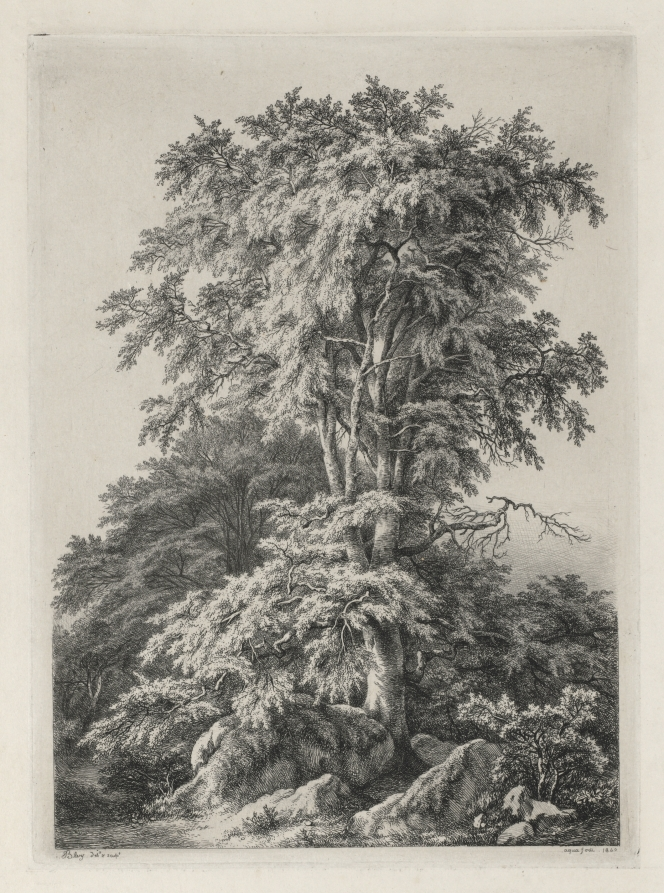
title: Studies Drawn and Engraved after Nature: The Beach, Fontainebleau (Études dessinées et Gravées D'après nature: Le hêtre, Fontainebleau)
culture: France, 19th century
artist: Eugene Bléry (French, 1805–1886)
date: 1840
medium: lithograph on chine colle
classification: Print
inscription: lower left corner in pencil: "Etude d'Hetre a Fountainebleau Eug. Blery"